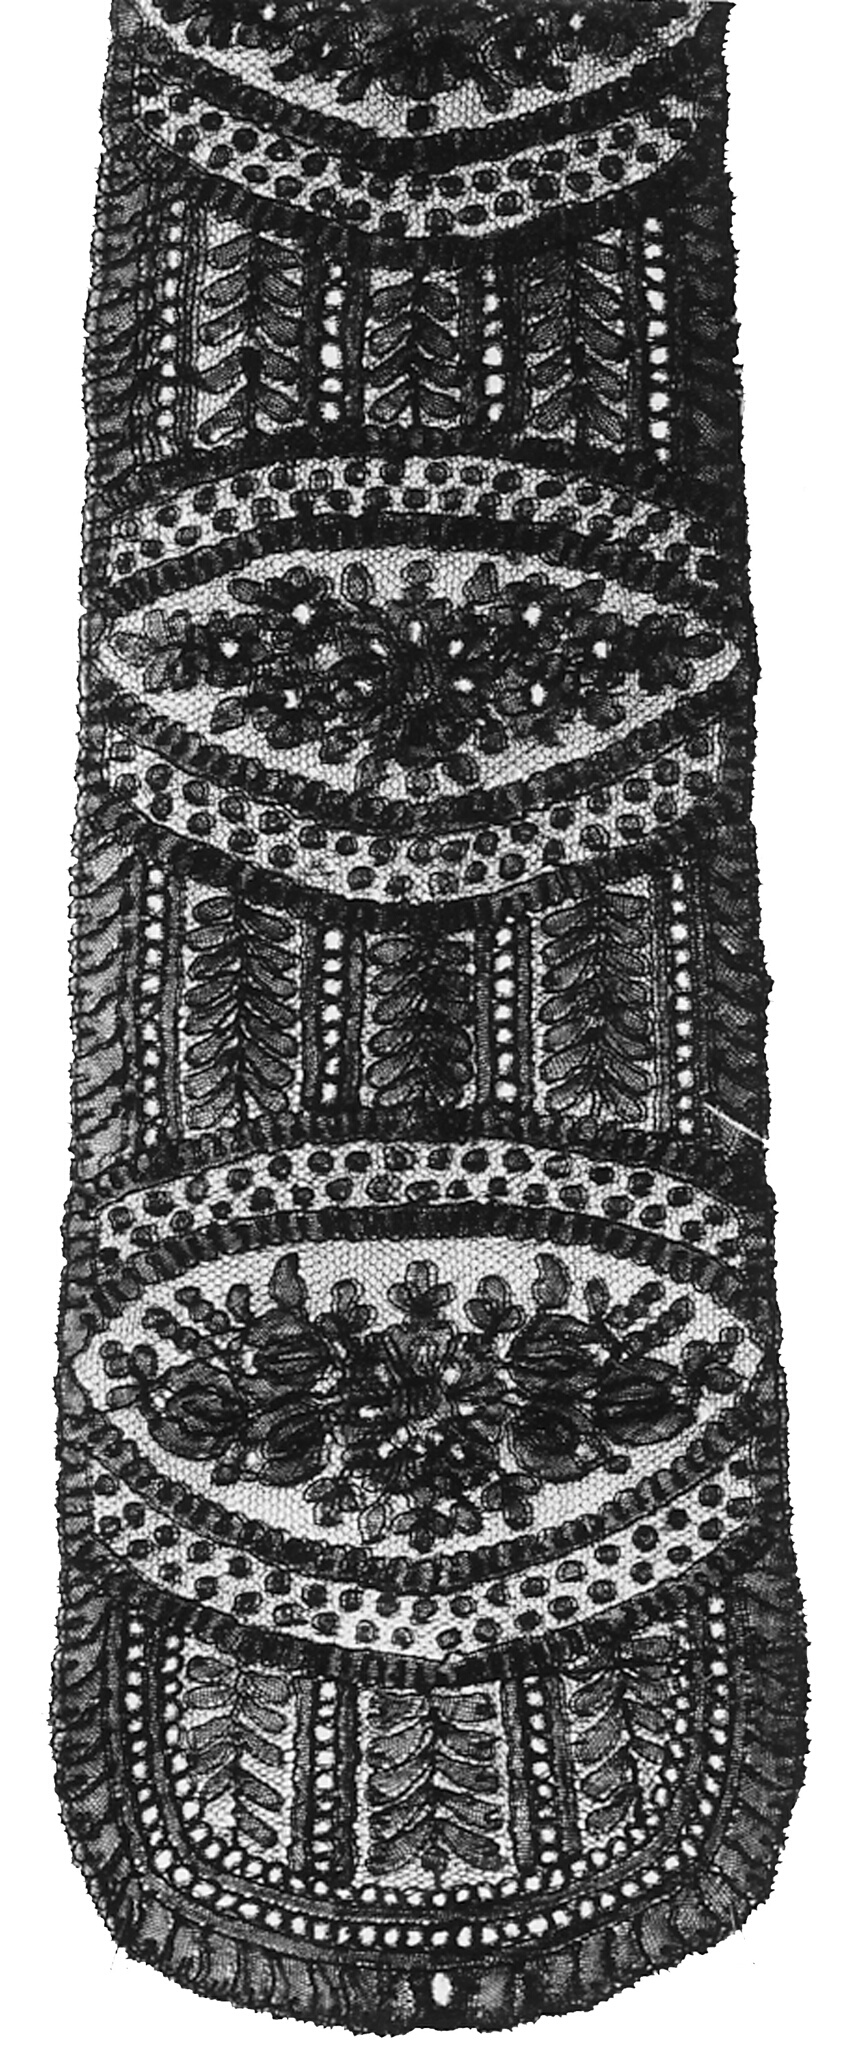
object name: Costume and Accessories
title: Pair of Lappets (Joined)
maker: France, probably Bayeux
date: 1860s/70s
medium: Silk, bobbin straight lace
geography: France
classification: costume accessory; lace - bobbin; textile; costume; costume accessory - headdress; costume accessory worn above the waist